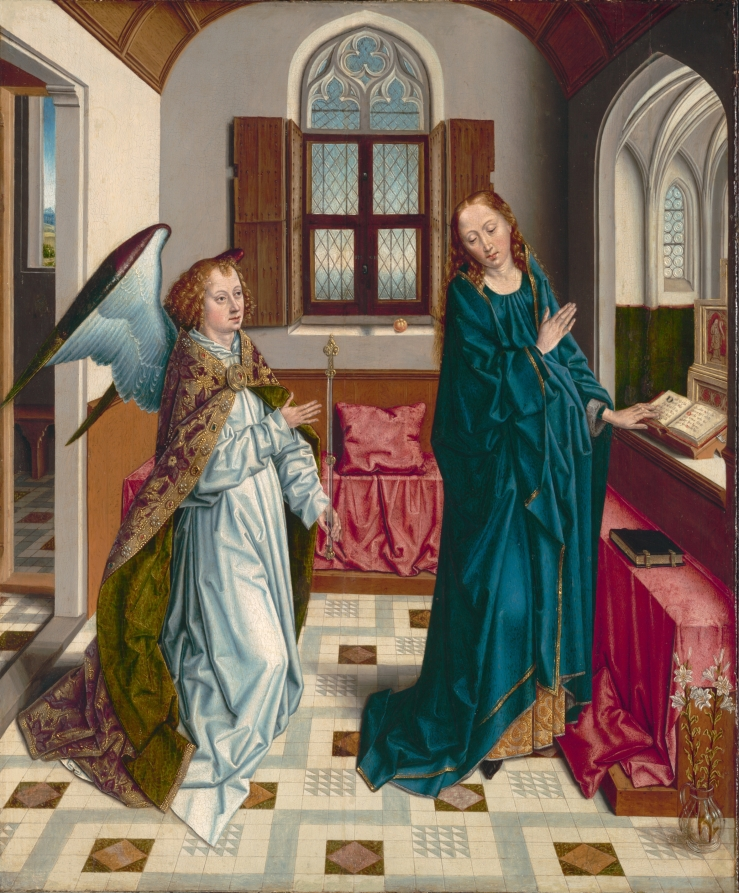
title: The Annunciation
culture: Netherlands, Leuven, 15th century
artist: Albert Bouts (Netherlandish, 1451/55–1549)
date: c. 1480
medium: oil on wood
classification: Painting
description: The scene of the Annunciation to Mary that she will give birth to Christ is depicted here as a contemporary scene that may have been familiar to any viewer at the end of the 1400s. Mary is portrayed as an ordinary but wealthy woman who is interrupted by the Archangel Gabriel as she reads a book of hours. This type of book was enormously popular in the late Middle Ages as a prayer and devotional book, particularly among the wealthy, literate nobility, and city aristocracy.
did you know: Netherlandish artists are known for their attention to lifelike detail: notice the sliver of landscape through the window at the left of this composition.